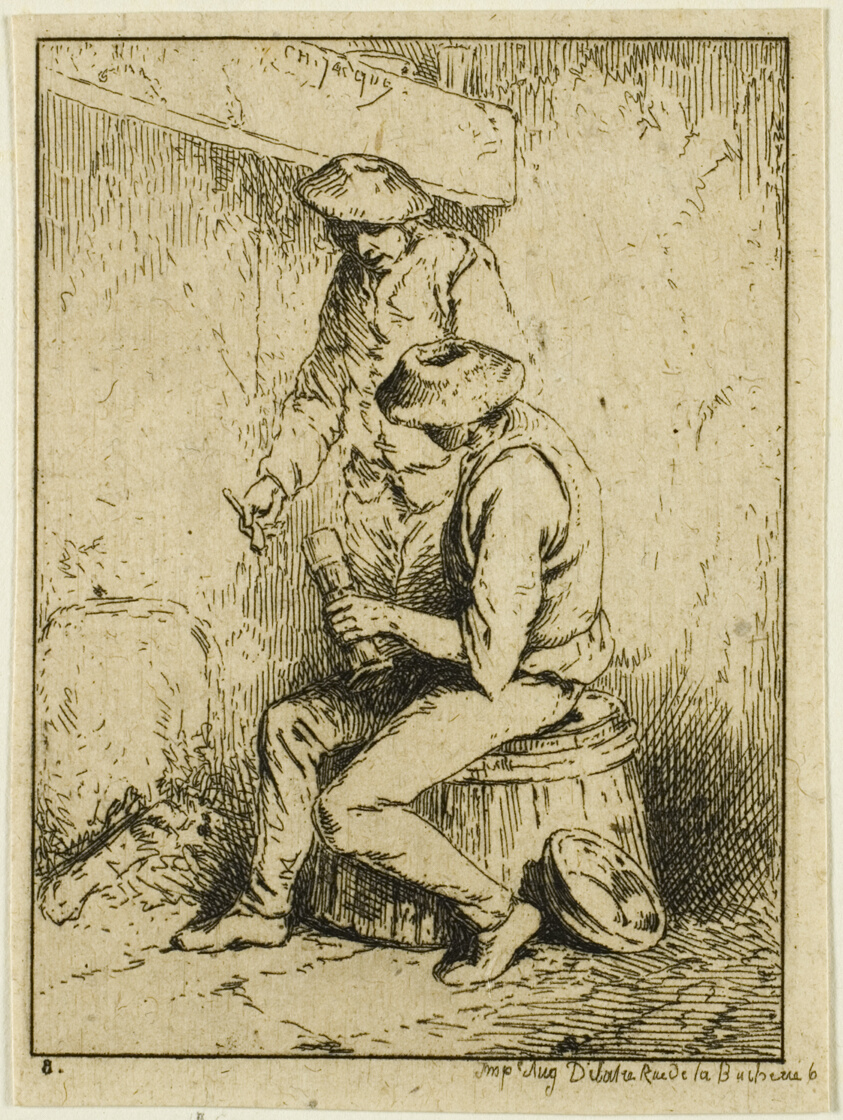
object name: Print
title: Drinkers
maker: Charles Émile Jacque (French, 1813-1894)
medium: Etching on cream chine laid down on ivory laid paper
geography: France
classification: etching; print; prints and drawing